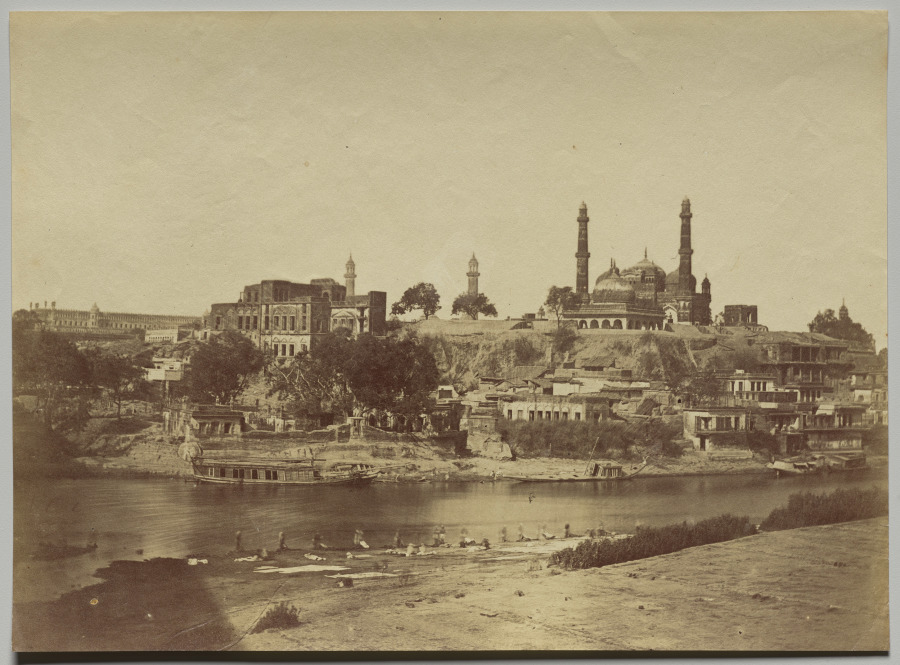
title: The Muchee Bhawan Fort and the Gomti River Taken from the Stone Bridge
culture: England, 19th century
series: Lucknow After the Siege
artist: Felice A. Beato (British, 1832–1909)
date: 1858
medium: albumen print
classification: Photograph